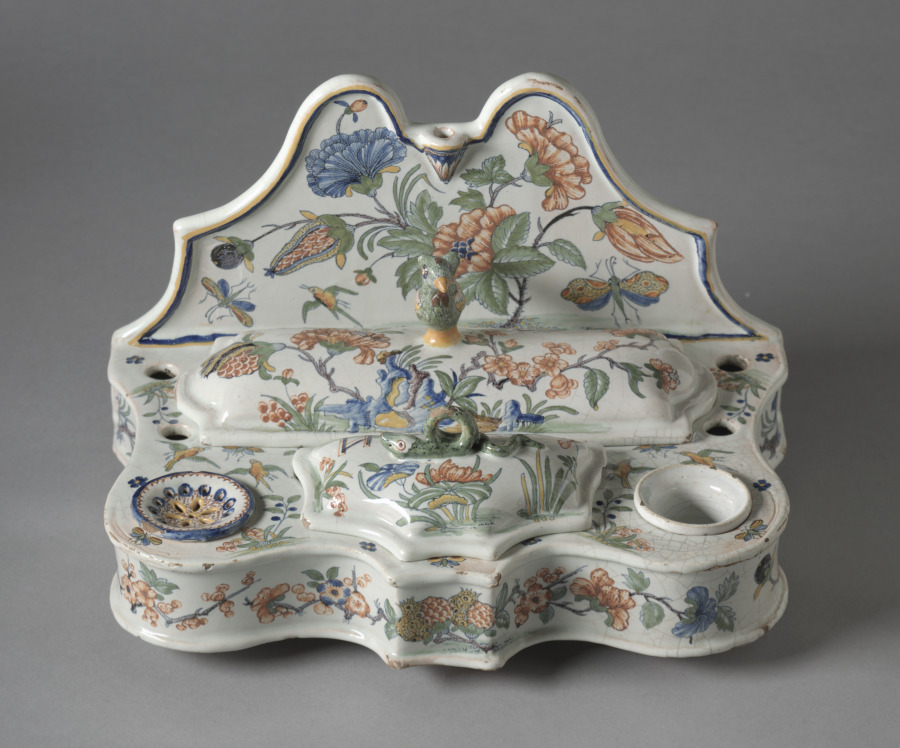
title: Writing Stand with Inkwells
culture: France, Sinceny, 18th century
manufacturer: Sinceny Factory (French)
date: 1746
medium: Tin-glazed earthenware (faience) with enamel decoration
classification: Ceramic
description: The faience factory at Sinceny was an offshoot of that at Rouen. In style, Sinceny closely resembles later Rouen wares with polychrome decoration. The stylized flowers and insects which decorate this writing stand are entirely typical of Sinceny faience.